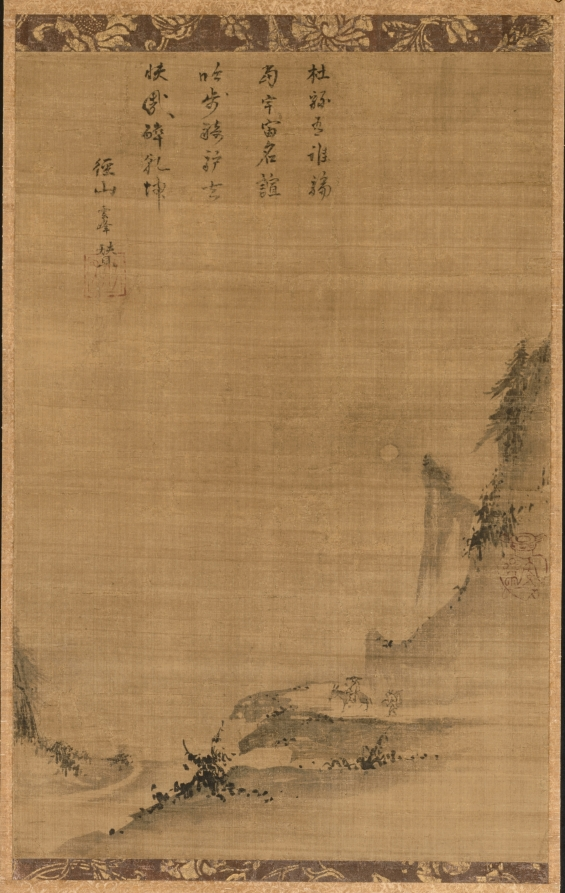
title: Mountain Landscape in Moonlight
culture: China, Southern Song dynasty (1127–1279) to Yuan dynasty (1271–1368)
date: 1200s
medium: hanging scroll; ink on silk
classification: Painting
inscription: 2 unidentified seals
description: Painted in modulated monochrome ink washes with dark dots for foliate accents, the anonymous artist successfully suggests the dense atmosphere of a warm summer night. Under a full moon a scholar rides a mule, accompanied by a servant who carries his belongings. The poem inscribed by Chan (Zen) priest Yunfeng Miaogao identifies the figure as the Tang dynasty poet Du Fu 杜甫 (712–770). Who rides Du [Fu]'s mule: Through the universe his name resounds. Chanting poems as he rides off on his mule, How quickly does he become drunk with Heaven and Earth!